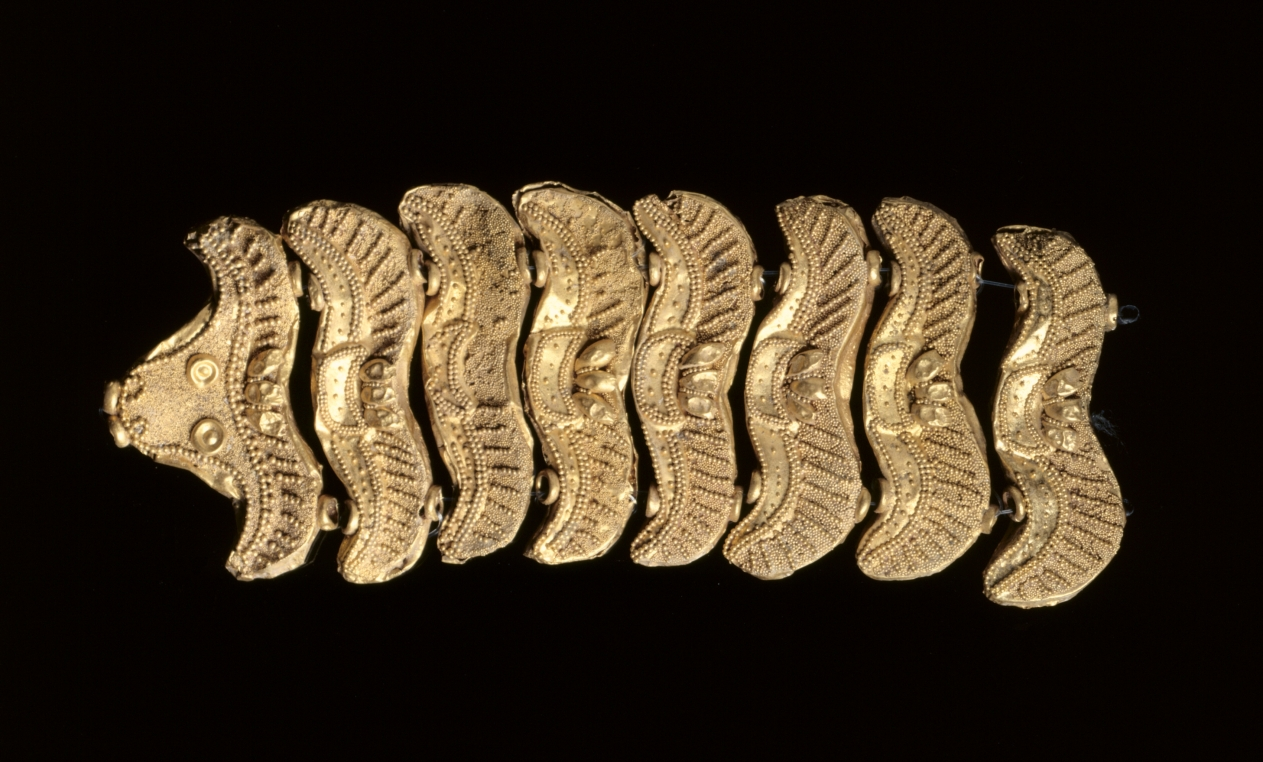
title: Set of Pendants Ending in a Bull's Head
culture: India, Shunga period (185–78 BCE)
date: 185–72 BCE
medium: gold repoussé with granulation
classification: Jewelry